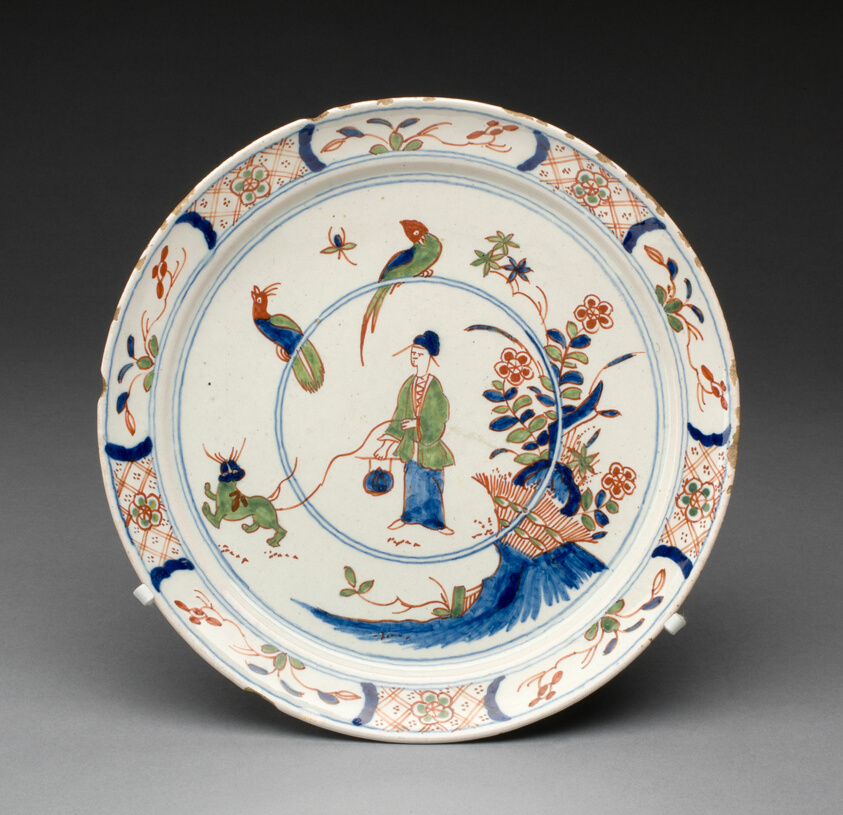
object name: Ceramics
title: Plate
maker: Delft, Netherlands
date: c. 1700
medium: Tin-glazed earthenware (Delftware)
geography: Delft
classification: plate (general, dish); dish (vessel); earthenware; ceramics; european decorative arts